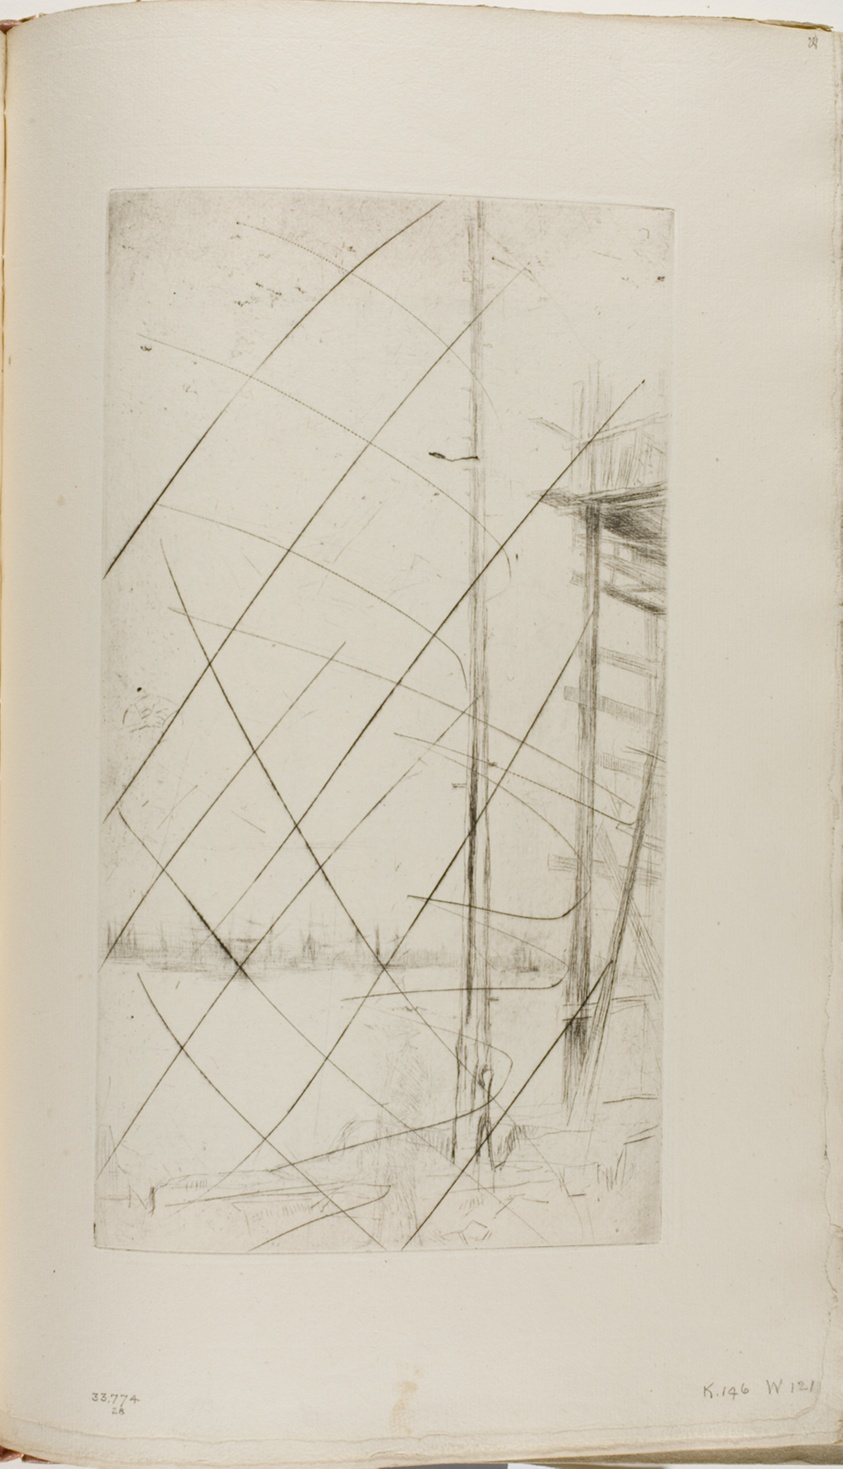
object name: Print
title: Shipbuilder's Yard, Liverpool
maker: James McNeill Whistler (American, 1834-1903)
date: 1875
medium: Drypoint with foul biting, with drypoint cancellation, in black ink on ivory wove paper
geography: United States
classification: drypoint; prints and drawing; book; foul biting; print; paper